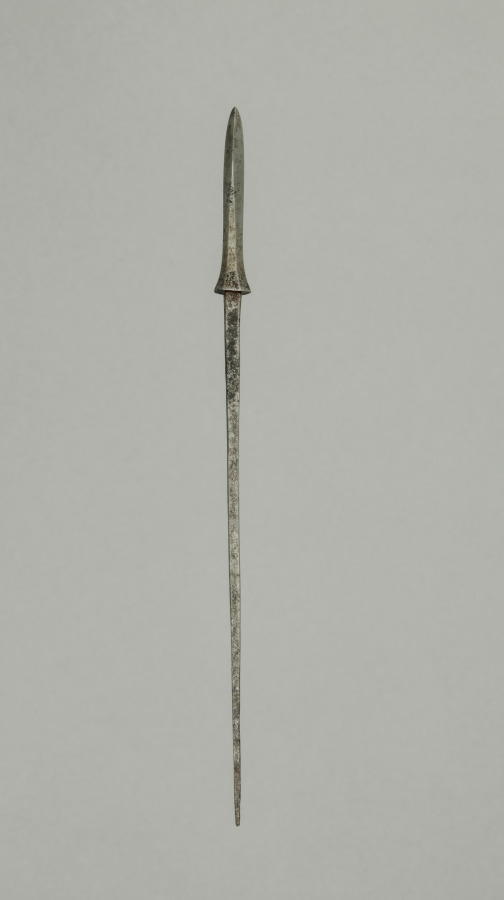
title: Arrow Point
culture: Japan, Edo period (1615–1868)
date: 1700s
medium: steel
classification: Arms and Armor